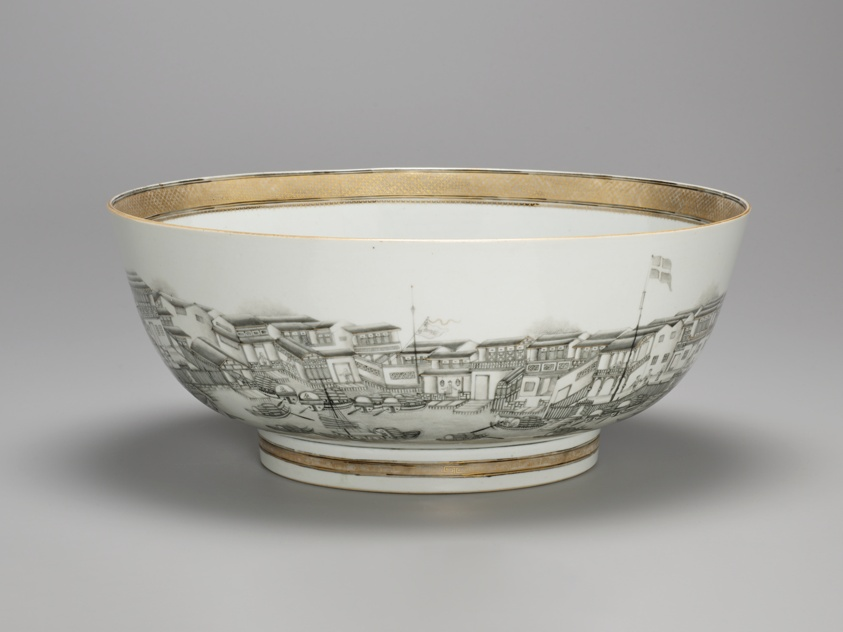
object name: Ceramics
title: Punch Bowl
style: chinese export, Export porcelain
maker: Artist unknown (Chinese, made for the American market); China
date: c. 1789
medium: Hard-paste porcelain, glaze, enamels in colors, gilding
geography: China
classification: punch bowl; chinese export porcelain; American market; art of the americas; ceramics; porcelain; decorative arts; pottery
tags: Canton, factory, port, cities, building, drinking